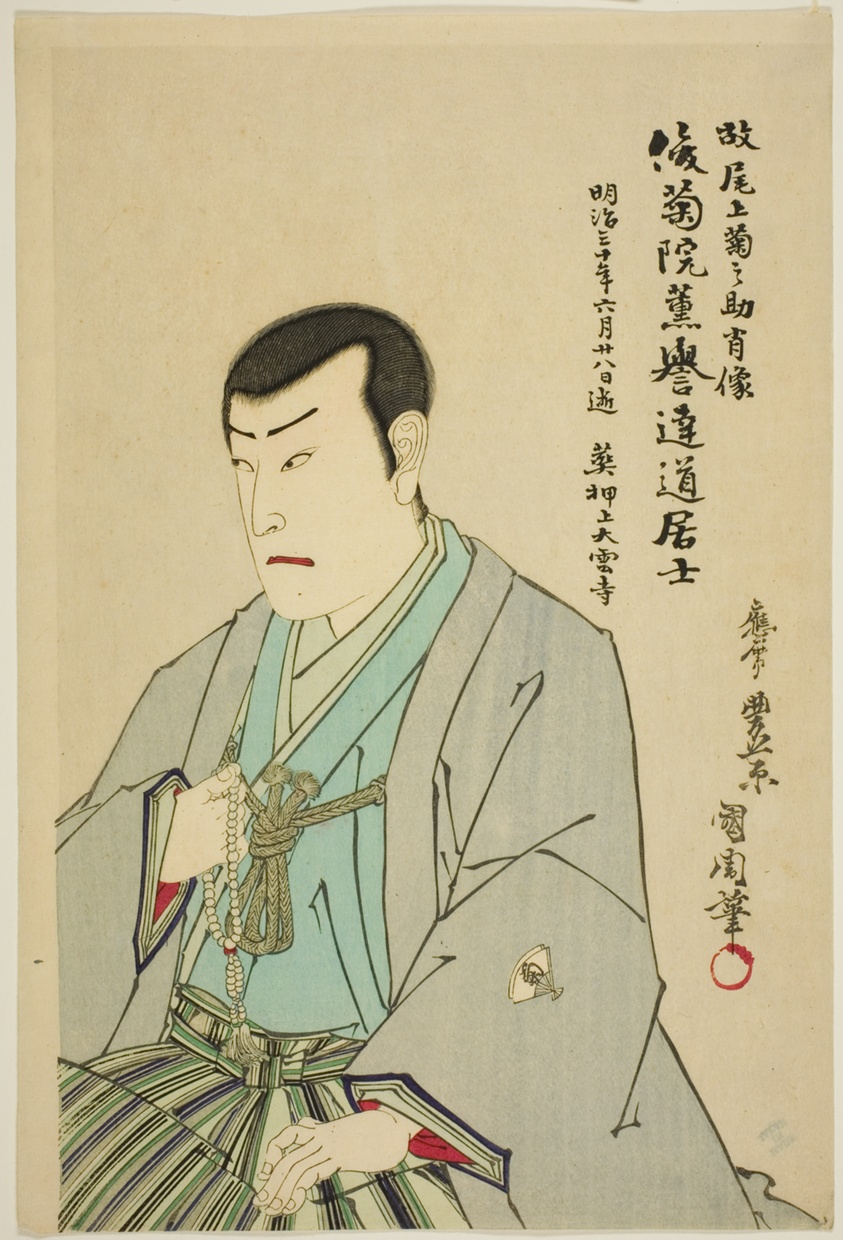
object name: Print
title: Memorial portrait of the actor Onoe Kikunosuke II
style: Japanese (culture or style)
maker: Toyohara Kunichika (Japanese, 1835-1900)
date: 1897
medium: Color woodblock print; oban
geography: Japan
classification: print; asian art